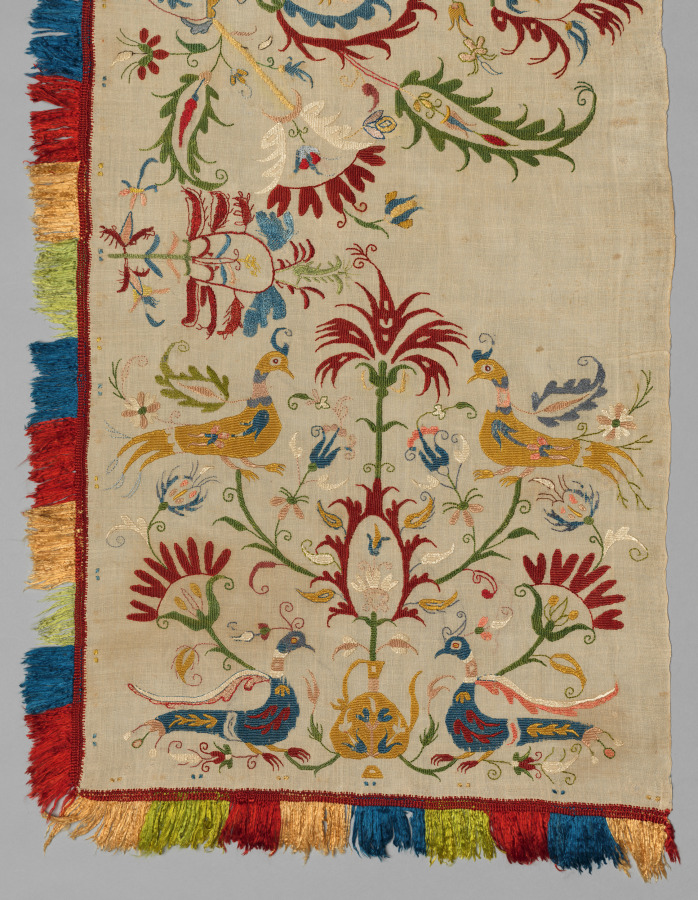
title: Side Panel of a Bedspread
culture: Greece, Sporades Islands, Skyros, 18th century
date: 1700s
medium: embroidery: silk on linen tabby ground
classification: Embroidery